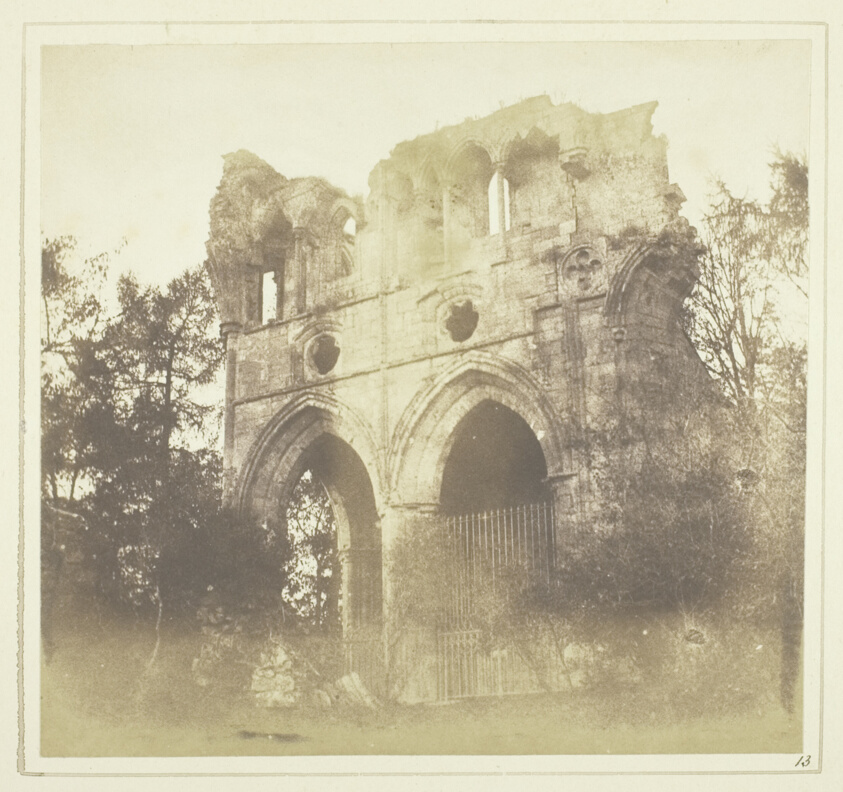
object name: Photograph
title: The Tomb of Sir W. Scott, in Dryburgh Abbey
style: 19th century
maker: William Henry Fox Talbot (English, 1800–1877)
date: 1844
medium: Salted paper print, plate XIII from the album "Sun Pictures in Scotland" (1845)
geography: England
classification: salted paper print; photographic process; photography; photograph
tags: Collected by Hugh Edwards